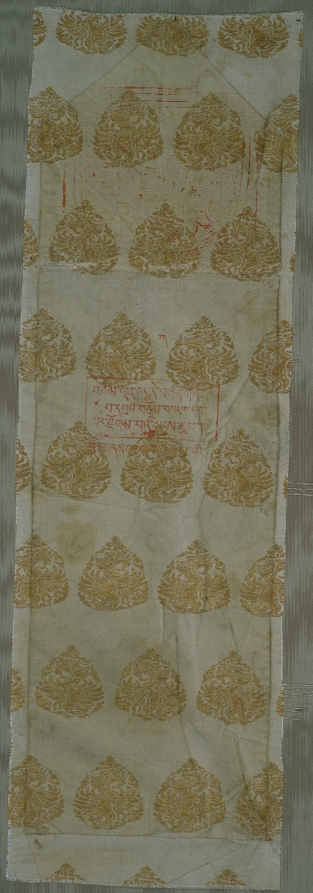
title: Brocade with Phoenixes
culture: Central Asia, Jin dynasty (1115-1234)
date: 1100s–1200s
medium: tabby, brocaded; silk and gold thread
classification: Textile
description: This elegant brocade of phoenixes, seen almost frontally, is woven with gold thread made from flat strips of gilded paper instead of the usual strips of gilded parchment. This suggests that the textile was woven in the southern part of the Jin state that had been annexed from the Chinese. Although probably intended to serve as secular clothing, this textile ended up in a Buddhist institution. The end was folded and stamped in red ink with a seated Buddha flanked by two Bodhisattvas (now faint and upside down). Two Tibetan inscriptions were also stamped (translation: "The Bhagavan, the Tathagata, the Arhat, the completely perfect Buddha," and "Salutations to Blo gnas.") Above, an isolated letter ka indicates that the textile was used to cover the first volume of a set of books.